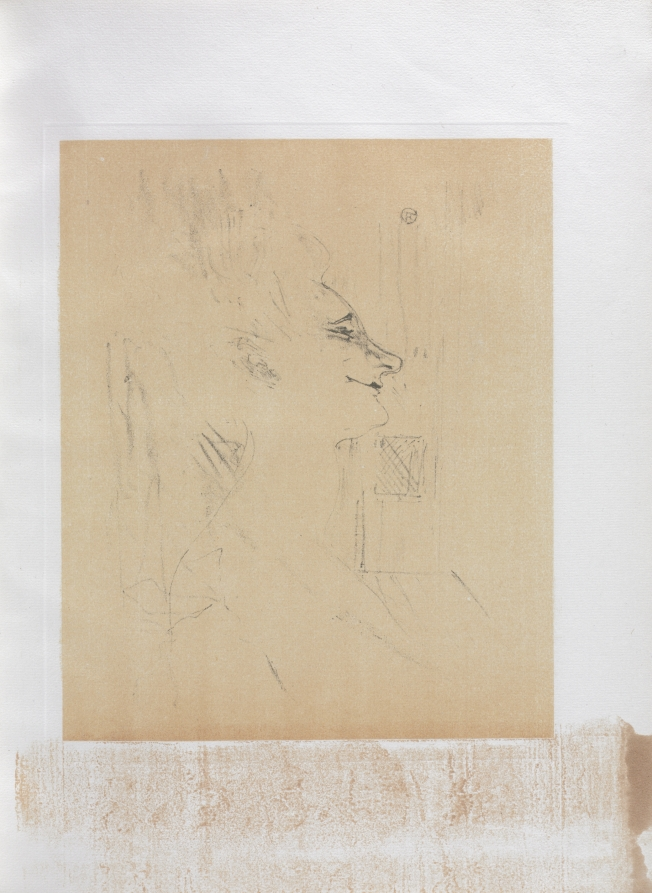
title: Yvette Guilbert-English Series: Soularde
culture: France, 19th century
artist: Henri de Toulouse-Lautrec (French, 1864–1901)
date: 1898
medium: lithograph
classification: Bound Volume